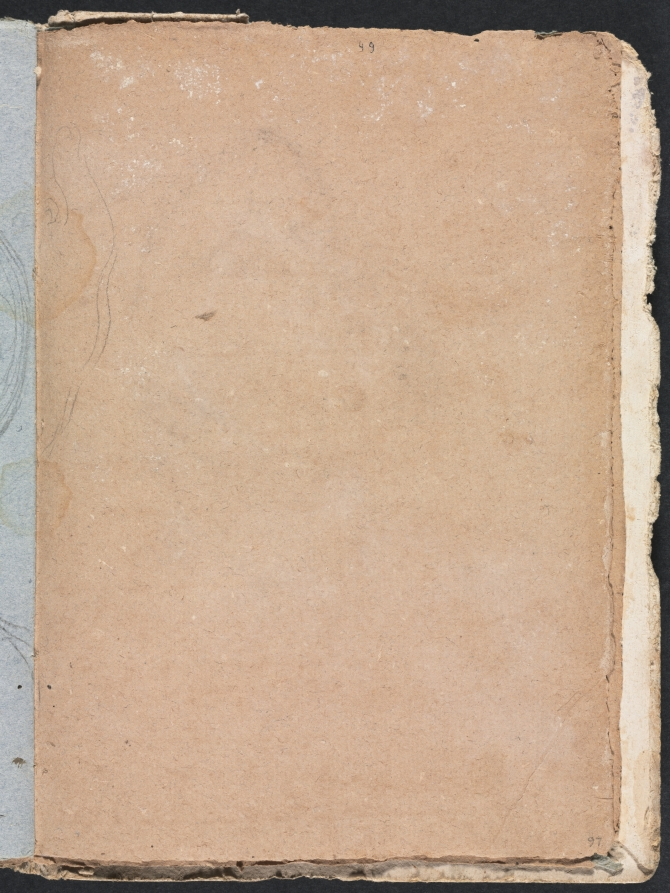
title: Verona Sketchbook: Indecipherable form (page 97)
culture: Italy, 18th century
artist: Francesco Lorenzi (Italian, 1723–1787)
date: 1760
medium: black chalk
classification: Bound Volume